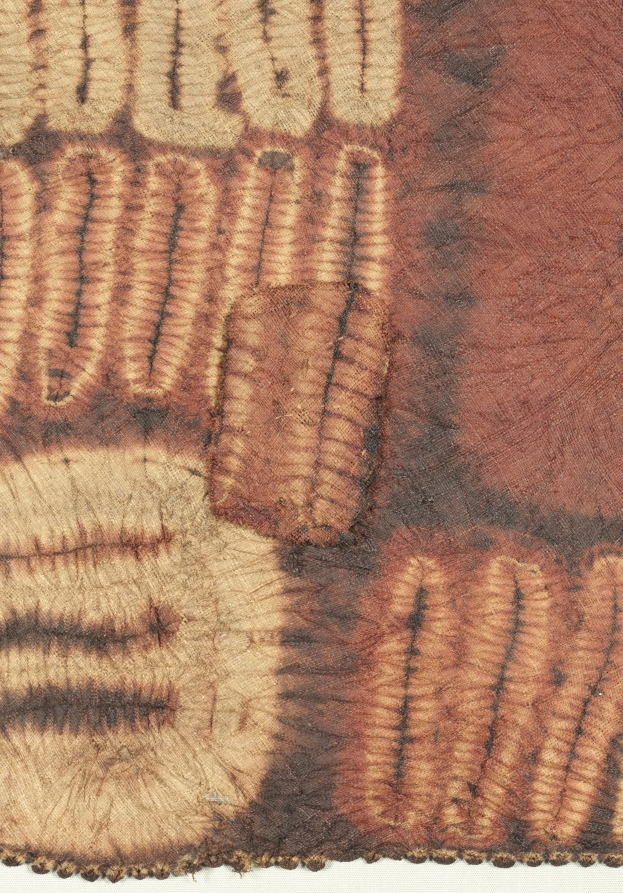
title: Man's Garment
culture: Africa, West Africa, Côte d'Ivoire, Dida-style weavers and dyers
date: possibly early 1900s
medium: Raffia palm fiber (Raphia ruffia or R. vinifera) and dye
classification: Textile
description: Displayed flat to highlight its designs and preserve its delicate fibers, this wrapper was meant to drape around the body. An elite man wore it with one corner over a shoulder, the knotted fringe skimming his ankles. The garment gained its earth-toned geometric patterns through plangi, a knot-and-twist resist dyeing technique; each color is applied in a different dye bath, from lightest to darkest. While their patterns are unique, these garments reflect regional influence: Dida women likely learned hand interlacing from Liberian Kpelle weavers. Such garments were given as gifts or worn on special occasions, at least into the 1990s.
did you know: The tying of fabric during the making of this garment gives its surface a distinctively "crinkled" texture.